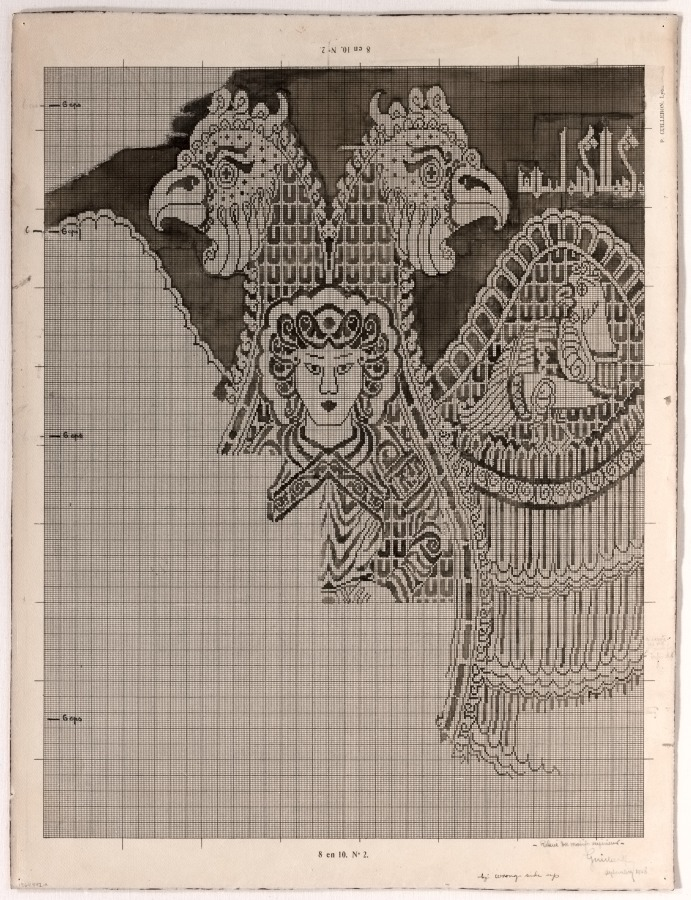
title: Schematic Drawings of Buyid Silk (1962.264)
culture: France, 20th century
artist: Félix Guichert (French)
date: 1900s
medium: ink on paper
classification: Drawing